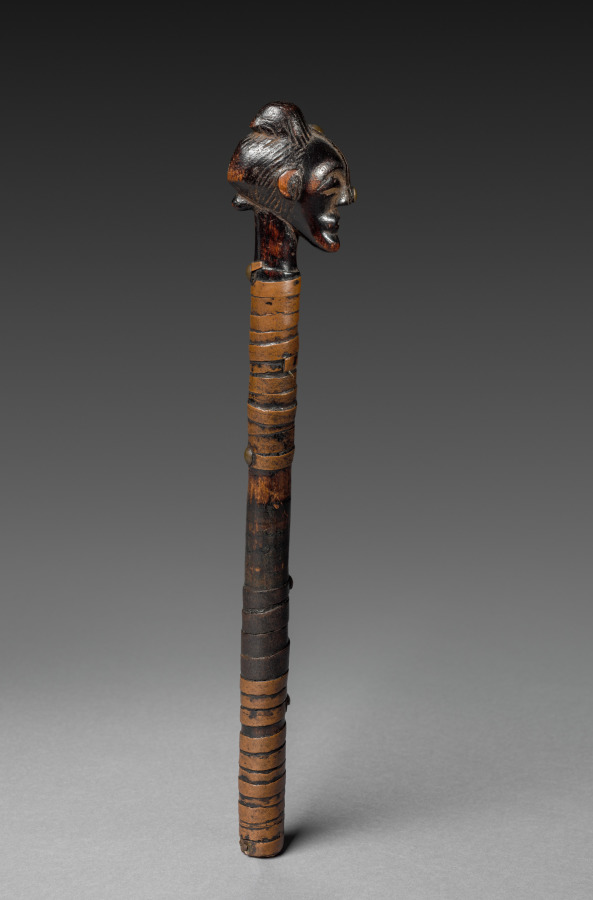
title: Fragment of a Staff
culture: Africa, Central Africa, Democratic Republic of the Congo, Kalundwe, unknown maker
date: late 1800s–early 1900s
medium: Wood, copper alloy, upholstery studs, and iron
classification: Implements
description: Though modest in scale and fragmentary in that its blade is missing, this is perhaps one of the finest surviving examples of a sculptural object in the little-known style of the Kalundwe people. It represents a poorly documented culture's artistic style that sits between the Songye to the west and the Luba to the east. Showing surface traces of continuous manipulation, the shaft of this short staff is entirely wrapped with a copper sheet, a common feature of rank emblems. Originally, it would have had an iron blade projecting from its mouth. However, rather than serving as a functional tool for carving, it would be hung over the shoulder to signal the high rank of its owner, be it a chief, another dignitary, or even a sculptor.